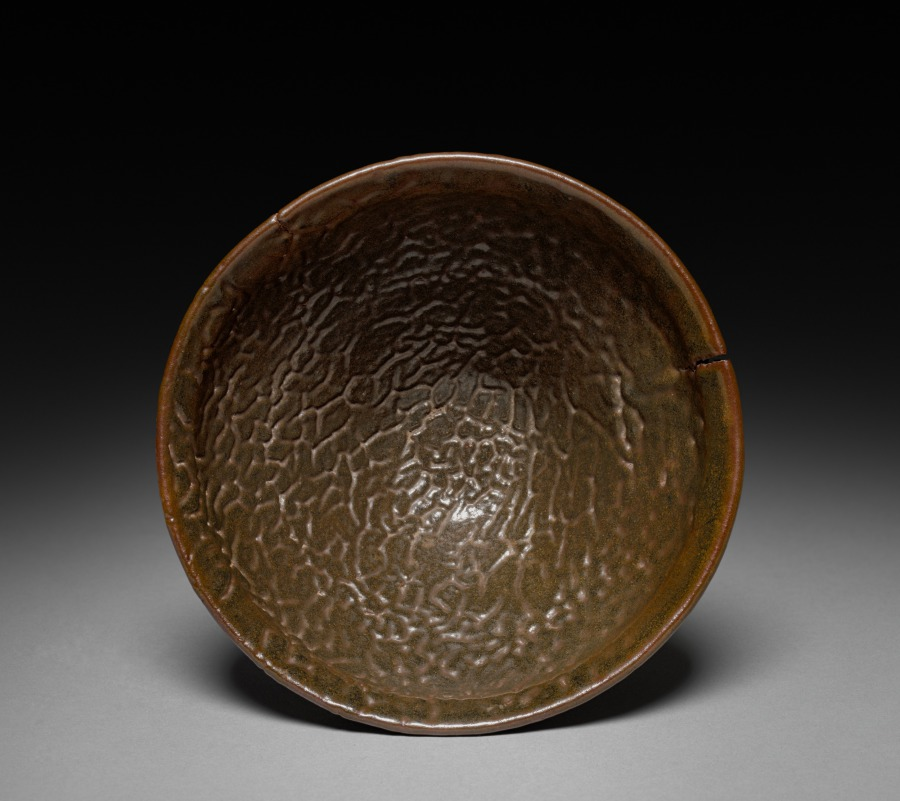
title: Tea Bowl: Jian ware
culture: China, near Shui ch'i, Song dynasty (960-1279)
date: 960–1279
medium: stoneware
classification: Ceramic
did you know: Jian ware was very popular with the tea cultures in China and Japan.